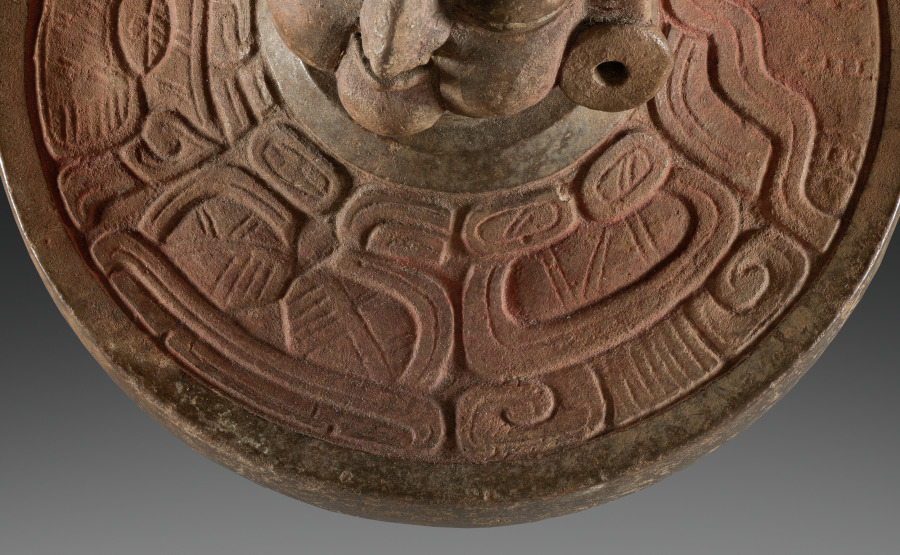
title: Tripod Vessel with Lid (lid)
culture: Mexico or Central America, Maya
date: 250–600 CE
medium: earthenware with pigment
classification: Ceramic